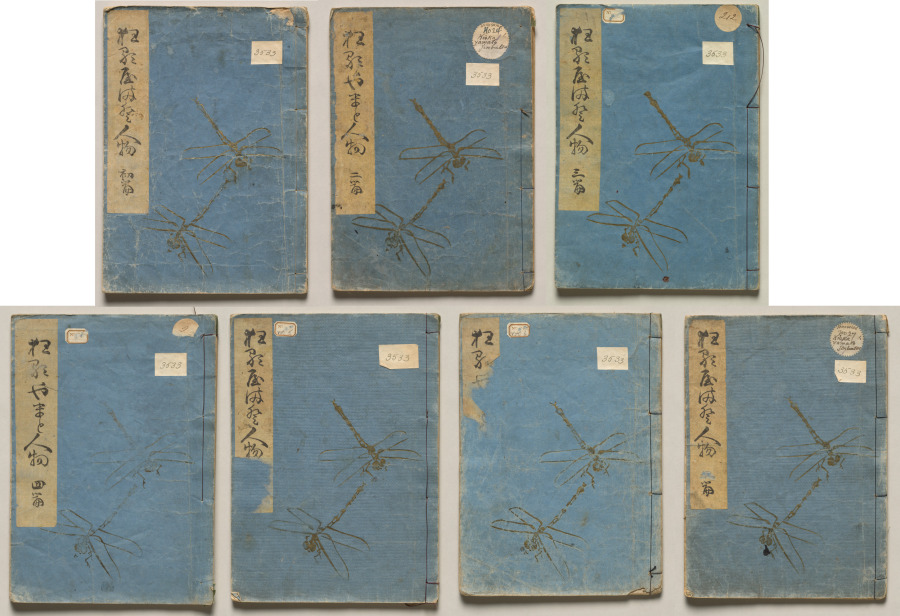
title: People of Japan in Light Verse (Kyōka)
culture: Japan, Edo period (1615–1868)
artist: Utagawa Hiroshige (Japanese, 1797–1858)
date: 1857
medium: Set of seven woodblock-printed books; ink and color on paper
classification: Bound Volume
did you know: This seven-volume set of illustrated books contains humorous poems about a variety of professions set around paired designs of people plying their trades.